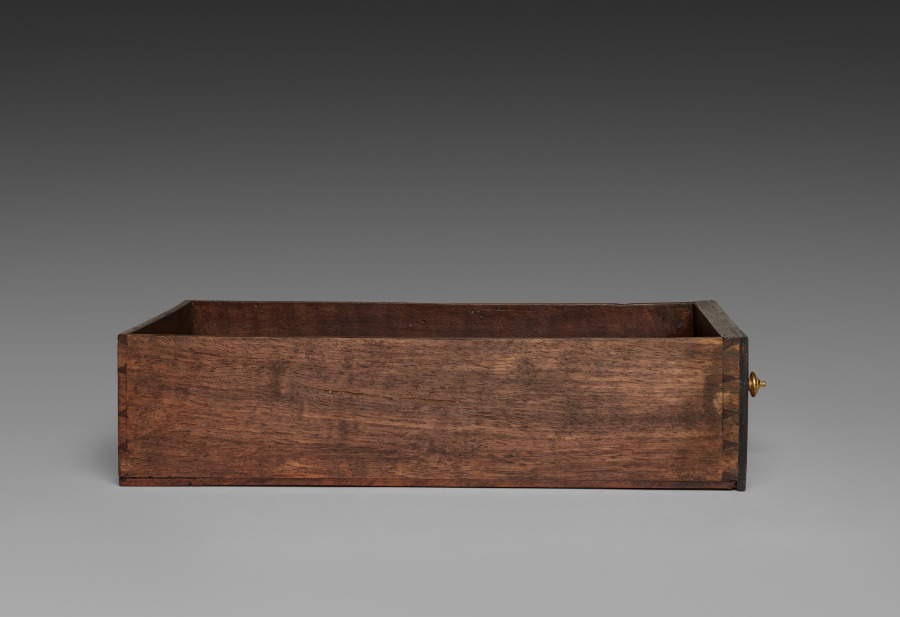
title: Interior Drawer for Cabinet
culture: France, late 17th Century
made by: André-Charles Boulle (French, 1642–1732)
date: c. 1690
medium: ebony, marquetry in metal and tortoise shell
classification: Furniture and woodwork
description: Appointed cabinetmaker to King Louis XIV in 1672, André-Charles Boulle became a master of furniture making in France during the late 1600s until his death in 1732. Known primarily for his use of marquetry, in which metal patterns are inlaid into tortoiseshell then applied within the veneered surface of the furniture, Boulle established a level of quality and craftsmanship few others could achieve. As a result, his work found favor at the royal court and among other aristocrats and diplomats eager to impress the king. The inclusion of a medallion depicting Louis XIV within the bronze decoration of this chest would have identified the owner with the royal court. Often exhibiting stout architectural proportions with elegant groups of inlaid motifs such as the parrot on the central panel of this chest, Boulle’s designs are an example of the intellectual fashion for contrasting ideas, materials, and motifs.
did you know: Originally designed to sit atop an elaborate tall stand, this chest was likely altered in the late 1700s to reduce its scale and height.